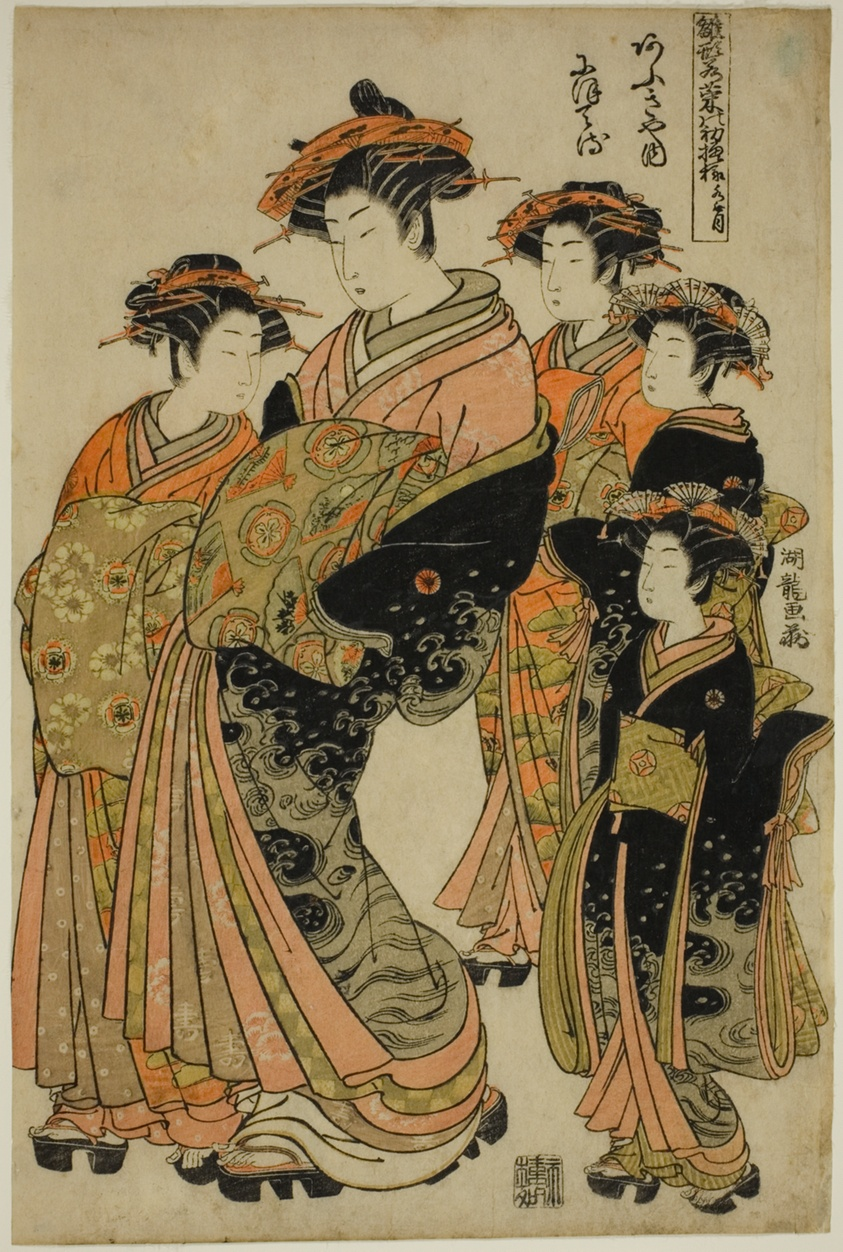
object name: Print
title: The Sixth Month (Minazuki): Nioteru of the Ogiya, from the series "Models for Fashion: New Designs as Fresh as Young Leaves (Hinagata wakana no hatsu moyo)"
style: Japanese (culture or style)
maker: Isoda Koryusai (Japanese, 1735-1790)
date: c. 1777/78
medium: Color woodblock print; oban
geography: Japan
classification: woodblock print; print; asian art